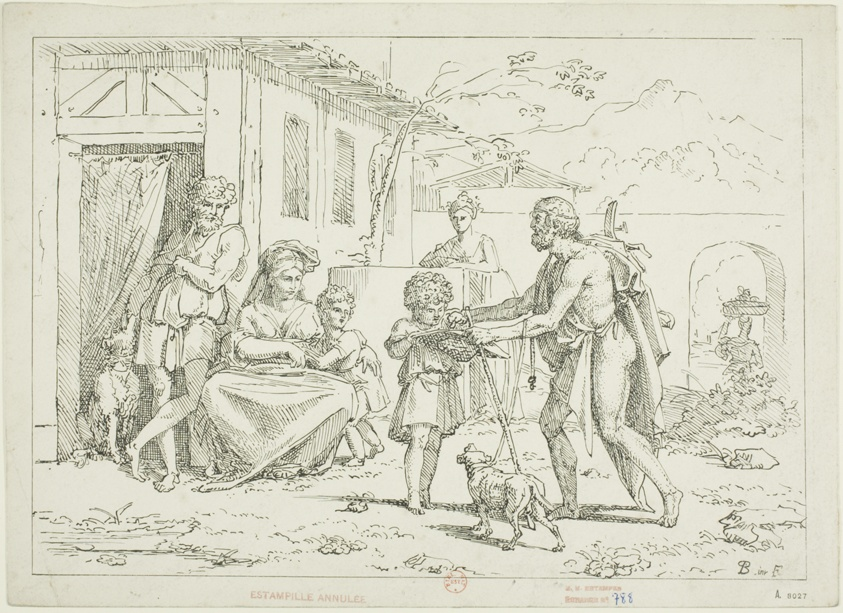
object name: Print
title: Homer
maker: Pierre Nolasque Bergeret (French, 1782-1863)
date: 1804–06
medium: Lithograph on paper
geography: France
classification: lithograph; print; prints and drawing